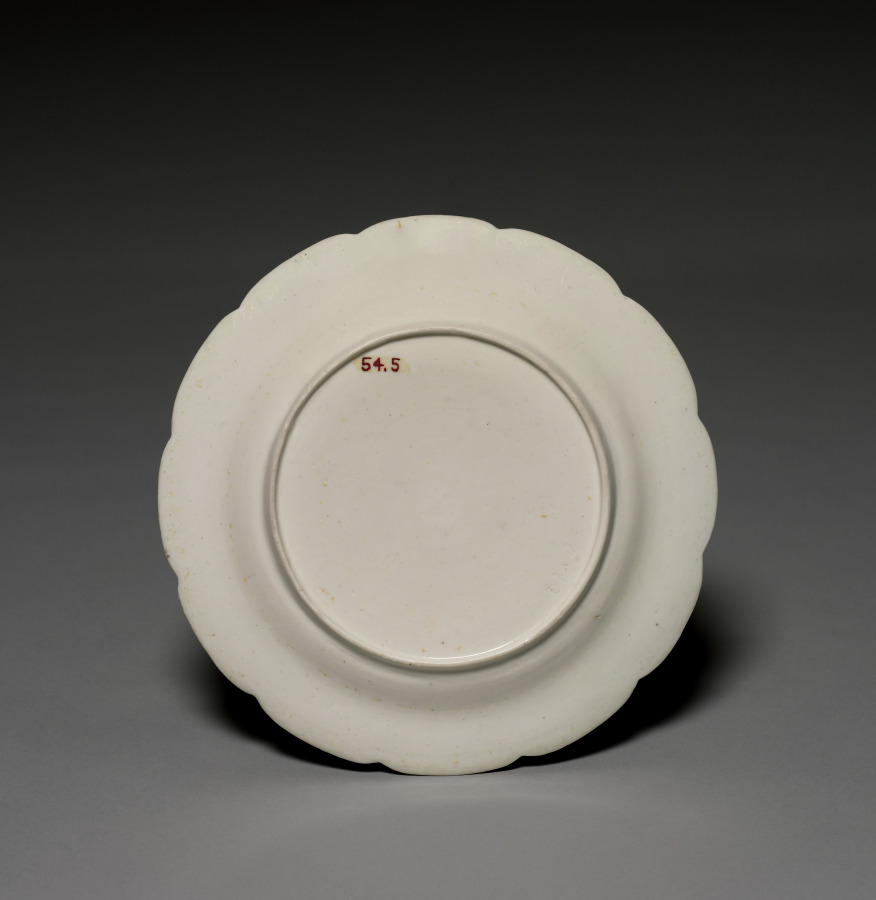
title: Plate (Assiette)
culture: France, Mennecy, 18th century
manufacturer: Mennecy Factory (French)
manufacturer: Mennecy- Villeroy Factory (French)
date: c. 1760–65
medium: soft-paste porcelain with enamel decoration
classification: Ceramic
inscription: [Incised]: "DV J"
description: As European porcelain production advanced, factories borrowed designs and techniques from one another in order to remain competitive in the porcelain market. Paintings of one to two figures perched on a rock or small hill overlooking a pastoral landscape were regularly reproduced on tea services fabricated at the Mennecy porcelain factory. These compositions were likely inspired by similar landscapes painted on porcelain at the Vincennes factory.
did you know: The hatched border of this plate was likely produced by engine-turning, a process by which clay is turned on a rotating tool to produce fluted, geometric, and diced patterns.